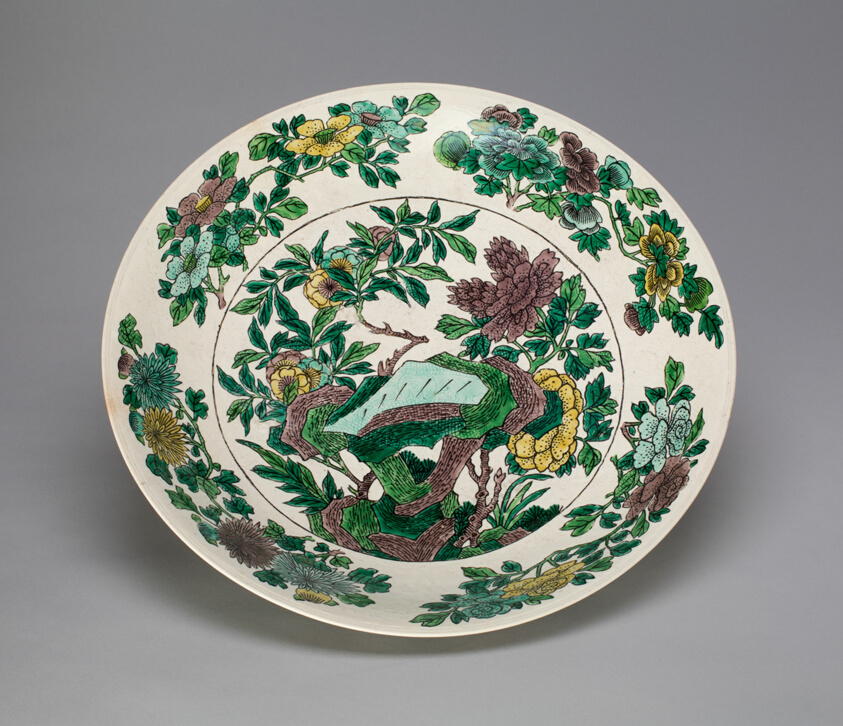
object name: Vessel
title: Green and Aubergine-glazed Dish (Susancai)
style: Chinese (culture or style)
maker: China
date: Qing dynasty (1644–1911), Kangxi period (1662–1722)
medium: Stoneware painted in overglaze enamels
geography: China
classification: dish (vessel); ceramics; asian art; vessel